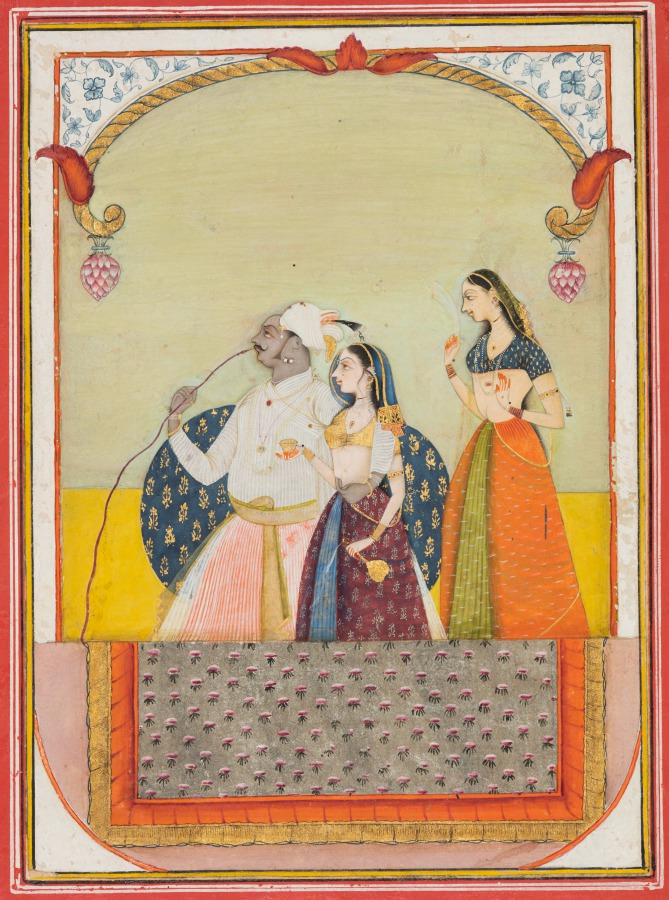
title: Maharaja Shri Anand Singh-ji and His Consort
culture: Northwestern India, Rajasthan, Rajput Kingdom of Bikaner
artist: Ustad Murad (Indian, active 1700s)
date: 1729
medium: Gum tempera, silver, and gold on paper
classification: Painting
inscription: sabī māhārājā śrī ānada sagaha jī rī ustai murāda nijara kīvī dīvālī rī saṃ[vata] 1786 mītī kāti suda 1 kīvī āṃhāṃmada rī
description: The artist used metallic paint to indicate the sumptuous materials of the carpet covered with roses that marks the place of the royal couple. The king affectionately slings one arm around the shoulders of his queen, who carelessly allows wine to flow out of the bottle. A gigantic indigo-and-gold cushion provides their backdrop, excluding their attendant. The blue and white arabesques in the spandrels—triangular spaces above the arch—point to the couple’s international sophistication; the elite in northwestern India imported blue-and-white Dutch tiles and Chinese porcelain.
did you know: The silver carpet marks the royal window where subjects can come to see him.